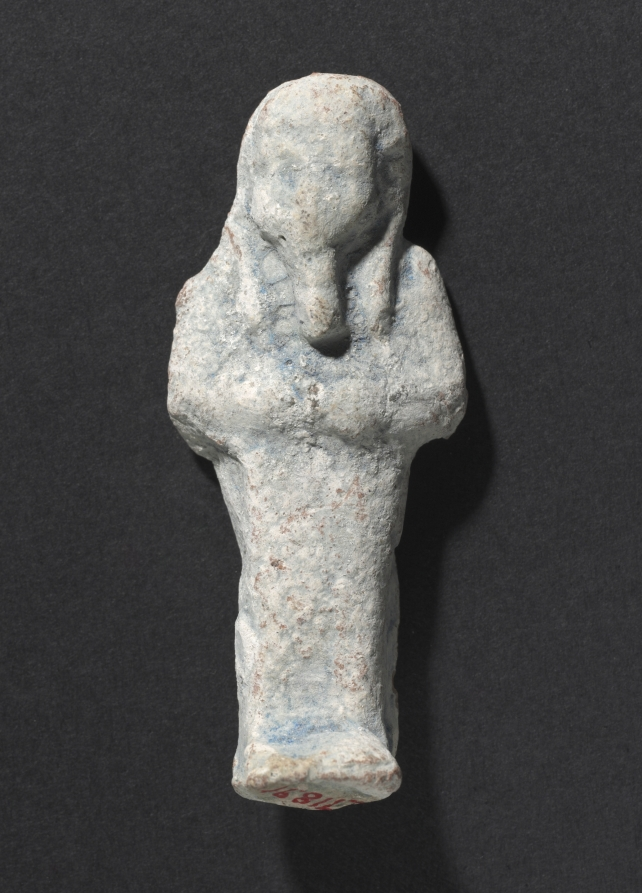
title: Shawabty of Ditamenpaankh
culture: Egypt, Late period (715–332 BCE), Dynasty 25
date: c. 715–656 BCE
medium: faience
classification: Funerary Equipment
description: High demand for shawabtys in the Late Period, a time when as many as 400 or more shawabtys were placed in the tomb with the deceased, gave rise to a specialized container for storing them: the shawabty box. This example is inscribed for the lady of the house, Ditamenpaankh, and was probably one of a pair originally made for her. The single-masted boat on the box's lid is perhaps an allusion to the pilgrimage of the deceased to the holy city of Abydos, the cult city of Osiris, king of the dead. The shawabtys inside are crude, mass-produced examples cast in an open mold. Made of terracotta, their blue paint imitates more costly shawabtys made of faience. As for the shawabty spell, it has been removed from its traditional location on the shawabty's front and relocated onto the sides of box, where it needed only to be written once, thus expediting production.